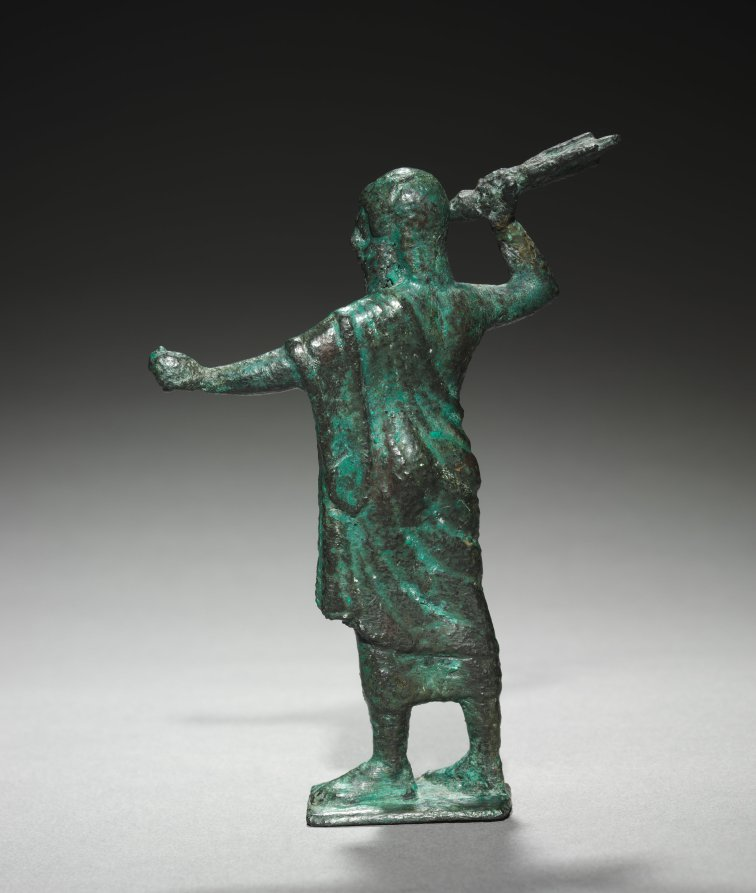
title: Statuette of Tinia (Zeus)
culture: Etruscan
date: c. 500 BCE, perhaps with modern patina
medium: bronze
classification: Sculpture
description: Tinia, the most powerful god in the Etruscan pantheon, often appears with a thunderbolt, the same attribute associated with Zeus and Jupiter in Greek and Roman religion and myth. The outstretched left hand may once have held a scepter. Although the figure finds numerous parallels among other Etruscan bronzes of the late 500s and early 400s BC, its surface is oddly rough and mottled with spots, perhaps the result of early modern treatment or coating meant to protect or improve its appearance. A 2001 analysis of the bronze composition showed results consistent with other ancient Etruscan alloys.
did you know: A break to the right wrist has been repaired with a dowel.